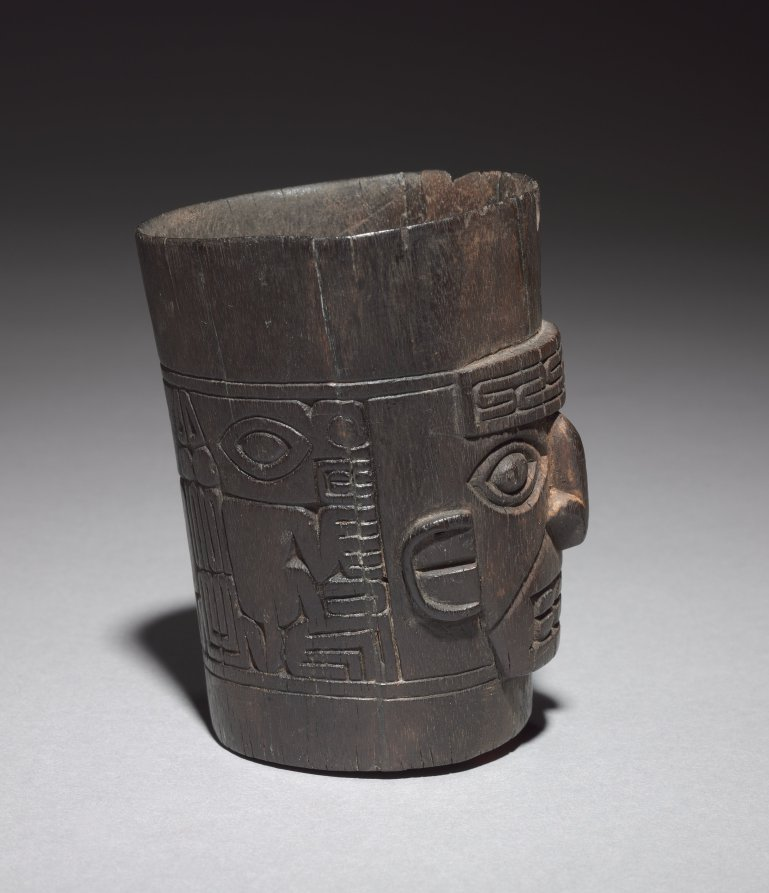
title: Cup with Head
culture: Peru, North-Central Coast(?), 9th-10th Century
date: 800–1000(?)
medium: wood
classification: Sculpture